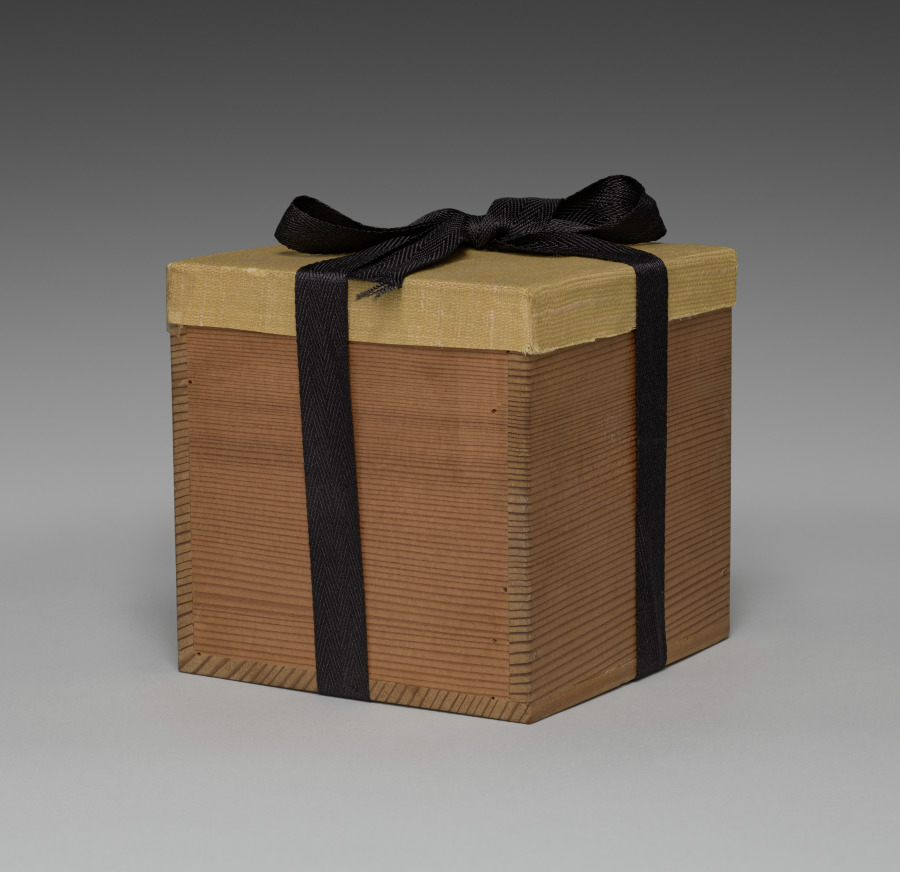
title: Teapot with Chrysanthemum Motifs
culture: Japan, Meiji period (1868–1912)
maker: Seifū Yohei III (Japanese, 1851–1914)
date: 1912–14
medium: Porcelain with overglaze color enamel and gold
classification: Ceramic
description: This side-handled sencha teapot has the lid flush against the body, forming an oblong orb. It is decorated with a sprinkling of similar chrysanthemum motifs in red, green, and purple overglaze color enamels with centers of pale red dotted with gold.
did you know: This teapot with chrysanthemum motifs shows off Seifū Yohei III’s technique of enamels painted over the glaze.